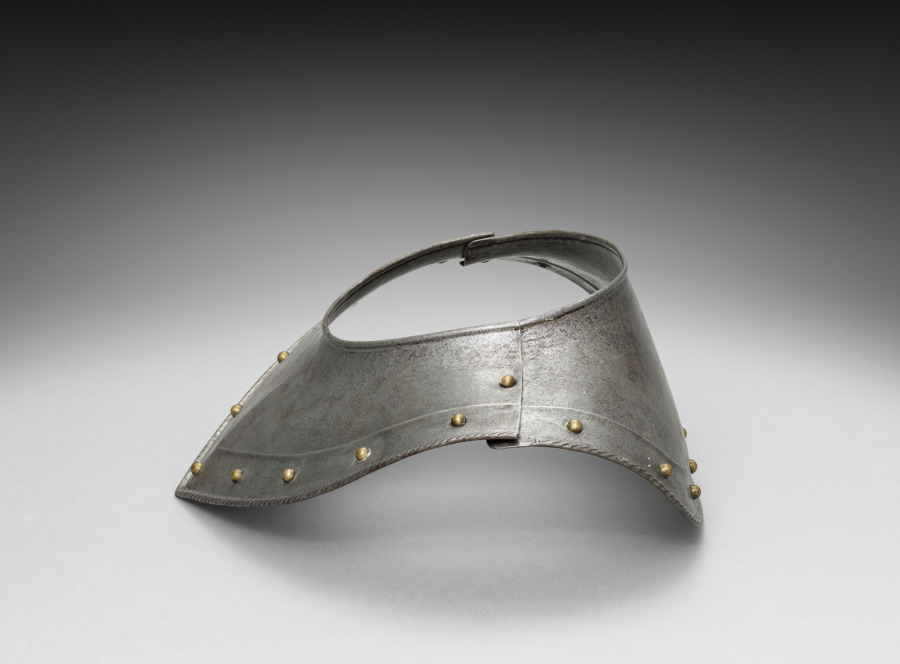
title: Colletin (two pieces)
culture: Germany, 19th century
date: 1801–1900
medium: steel with black paint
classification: Arms and Armor